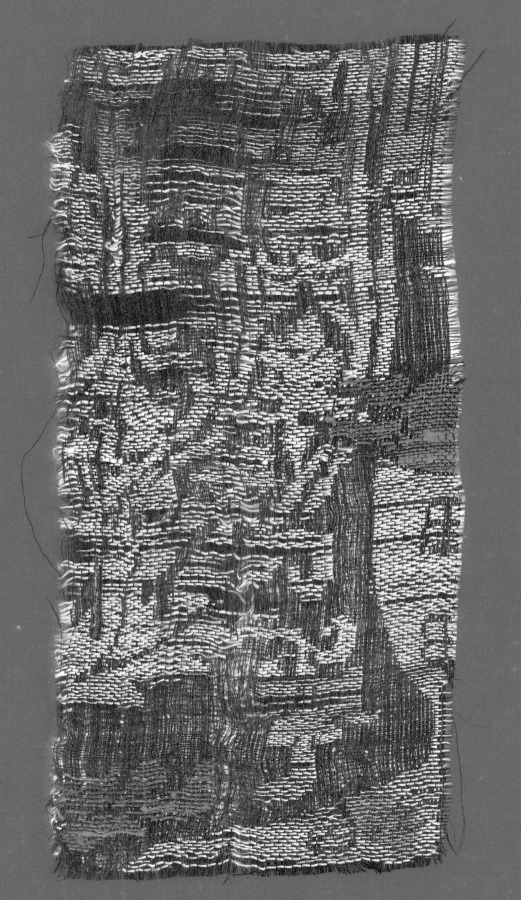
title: Three Fragments of Italian Gothic Silk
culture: Italy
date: 1300s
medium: lampas weave, brocaded; silk and gold thread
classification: Textile